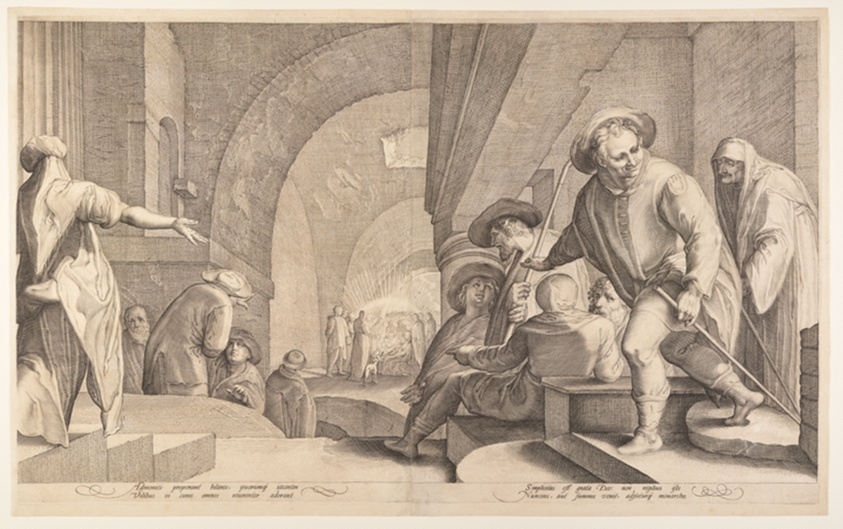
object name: Print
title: The Adoration of the Shepherds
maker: Jan Saenredam (Dutch, 1565–1607); after Karel van Mander (Dutch, 1548–1606)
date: c. 1590-1600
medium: Engraving on ivory laid paper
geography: Netherlands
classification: engraving; paper; print; prints and drawing